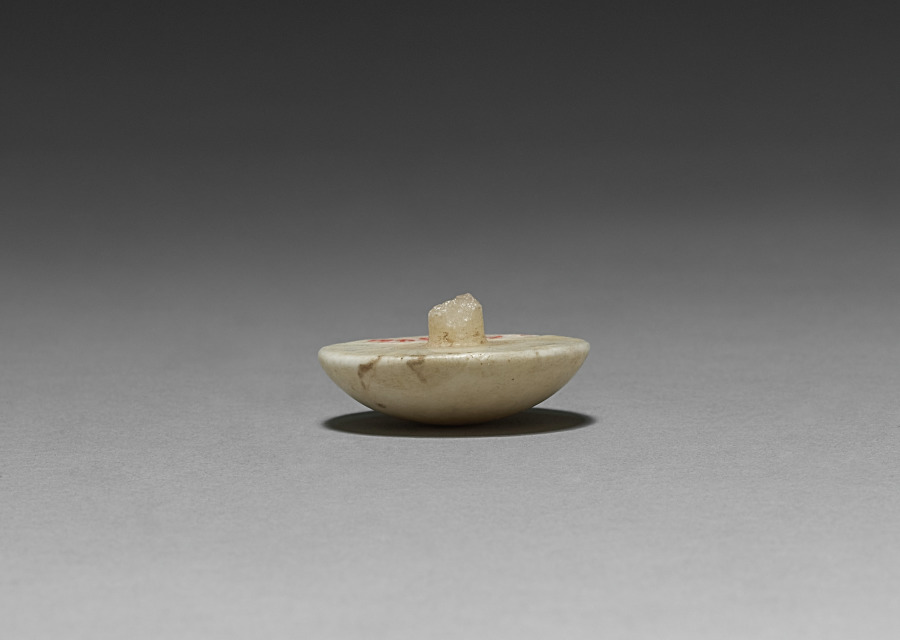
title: Ear Stud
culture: Egypt, New Kingdom (1540–1069 BCE), Dynasty 18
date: 1540–1296 BCE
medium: travertine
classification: Jewelry